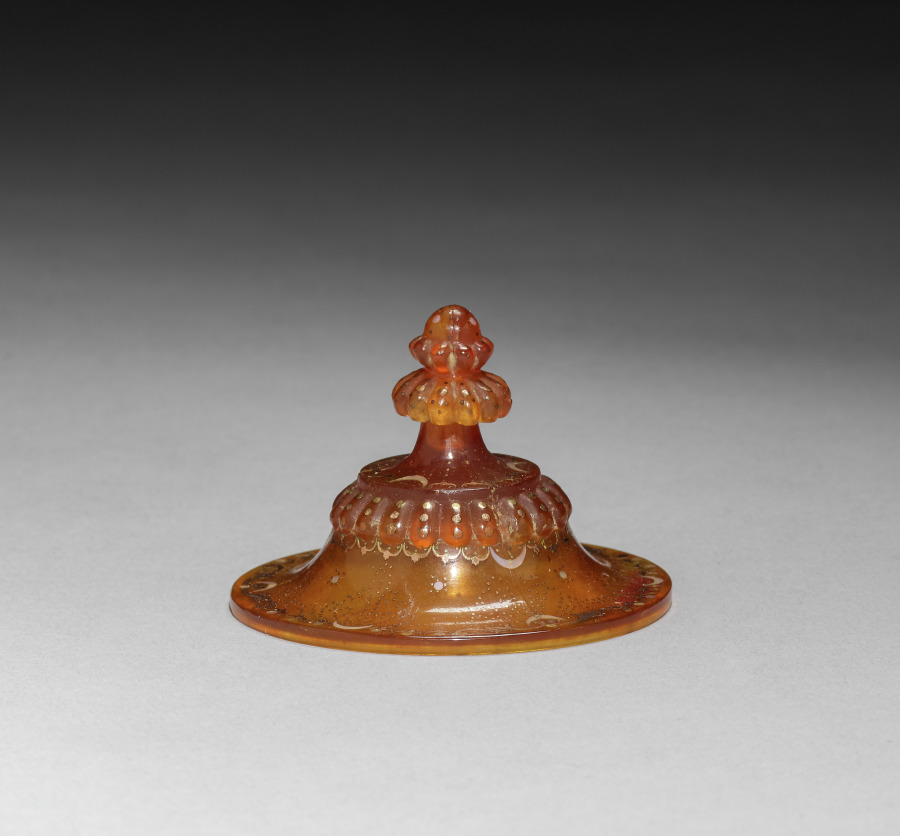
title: Cover for a Cup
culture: France, 18th century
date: c. 1730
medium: amber decorated with inlaid gold and mother-of-pearl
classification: Miscellaneous